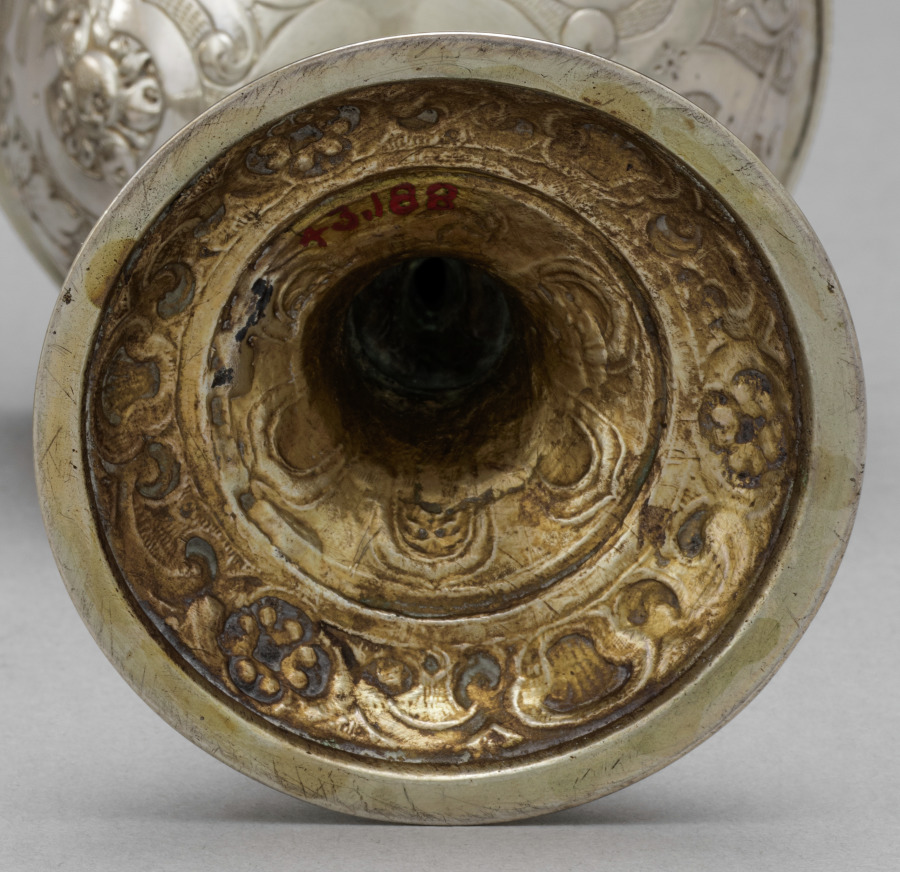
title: Bridal Cup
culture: Germany, Nuremburg(?), 17th century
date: c. 1600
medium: silver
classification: Silver